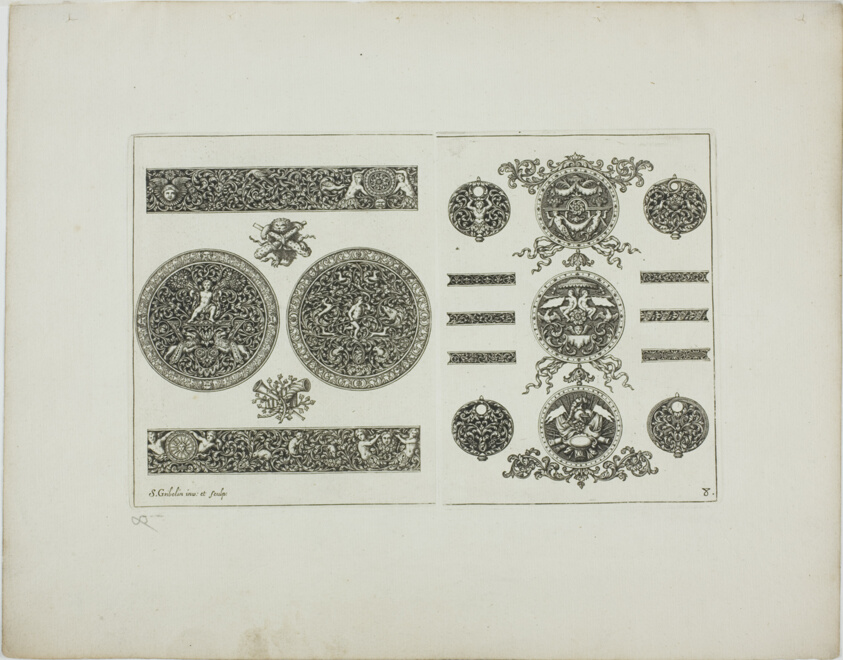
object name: Print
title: Plate Eight, from Book of Ornament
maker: Simon Gribelin II; French, 1661-1733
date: 1704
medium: Engraving on paper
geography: France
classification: engraving; print; prints and drawing